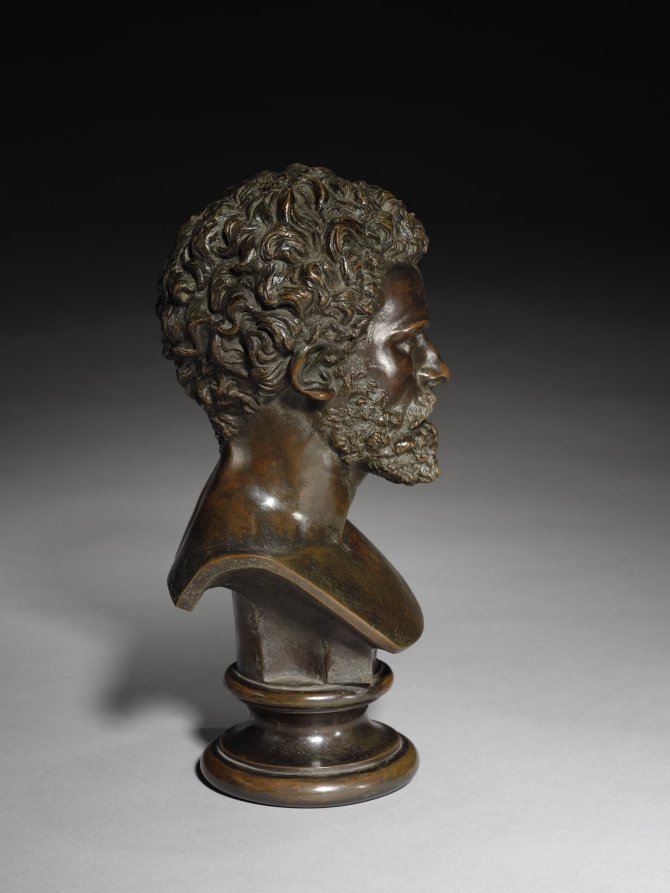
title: Henri Regnault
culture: France, 19th century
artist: Louis-Ernest Barrias (French, 1841–1905)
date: 1871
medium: bronze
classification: Sculpture